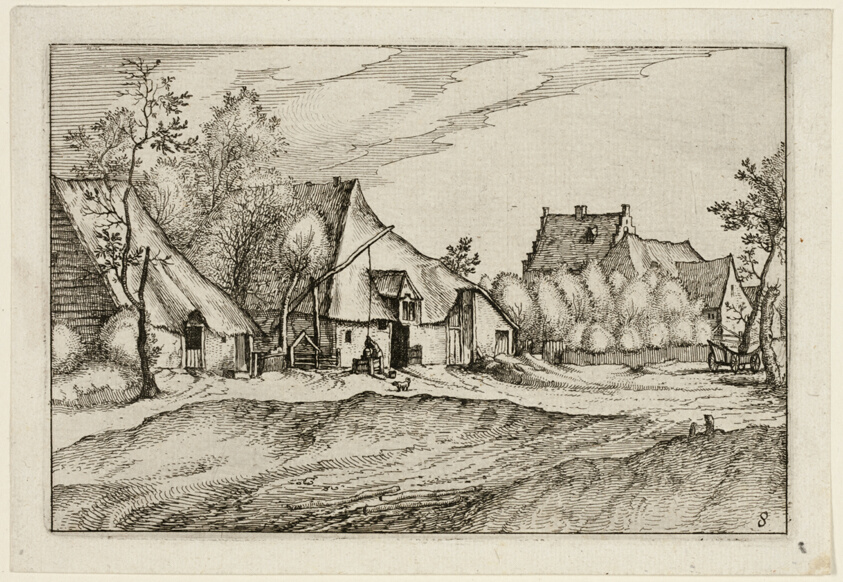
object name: Print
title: Farms in a Village, plate eight after Pictures of Farms, Country Houses and Rustic Villages (Praediorum villarum et rusticarum casularum icones)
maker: Claes Jansz. Visscher (Dutch, 1587-1652); after Unknown Flemish Artist, misidentified as Pieter Bruegel, the elder (Flemish, 1525/30-1569)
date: 1612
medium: Etching in black on ivory laid paper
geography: Netherlands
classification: etching; print; prints and drawing